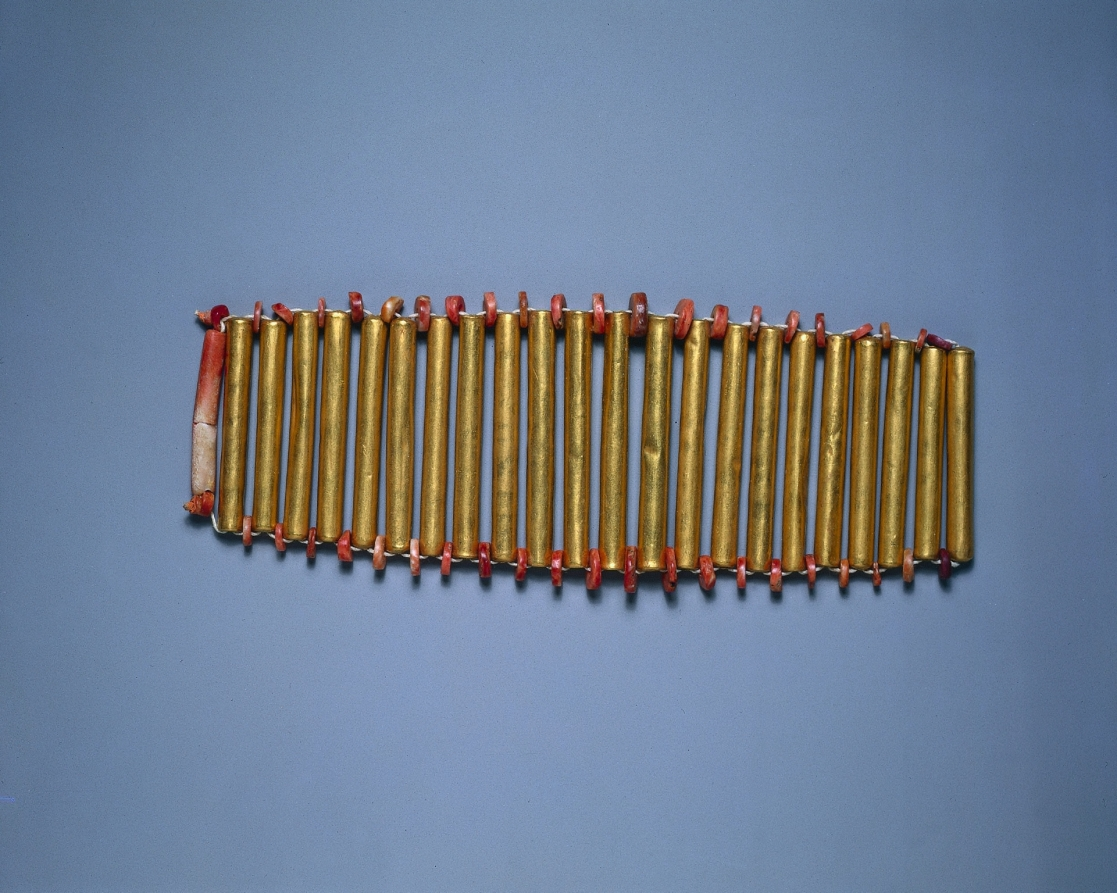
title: Bracelet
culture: Central Panama, (Sitio Conte?), Conte Style, 5th century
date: c. 400–500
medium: gold and shell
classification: Jewelry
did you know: These ancient beads were restrung in modern times.